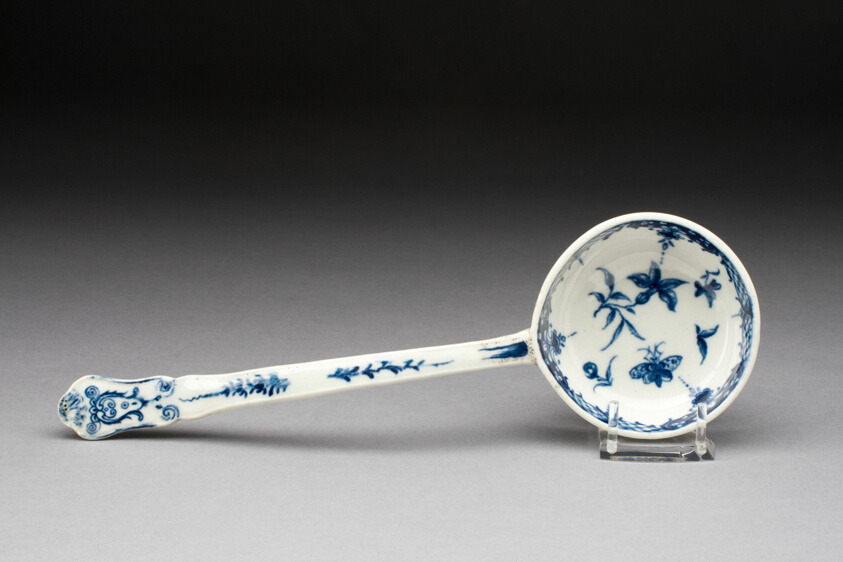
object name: Ceramics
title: Ladle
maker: Worcester Porcelain Factory (Warmstry House Period, 1751–1783); Worcester, England, founded 1751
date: c. 1760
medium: Soft-paste porcelain, underglaze blue decoration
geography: Worcester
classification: porcelain; ceramics; european decorative arts